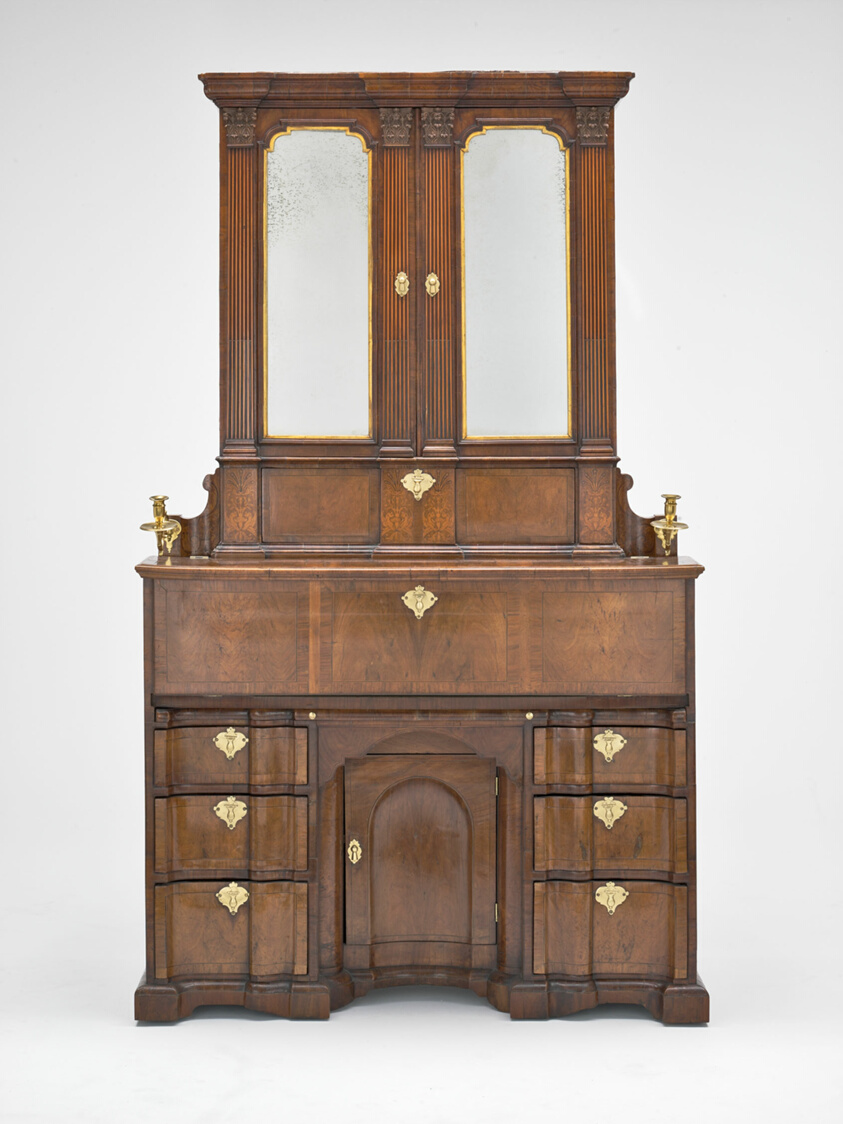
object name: Furniture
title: Secretary Cabinet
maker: John Kirkhoffer (Irish, active 1730s); Ireland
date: 1732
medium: Walnut, holly, mirror glass, and brass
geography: Ireland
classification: desk; furniture; european decorative arts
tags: interior design, furniture